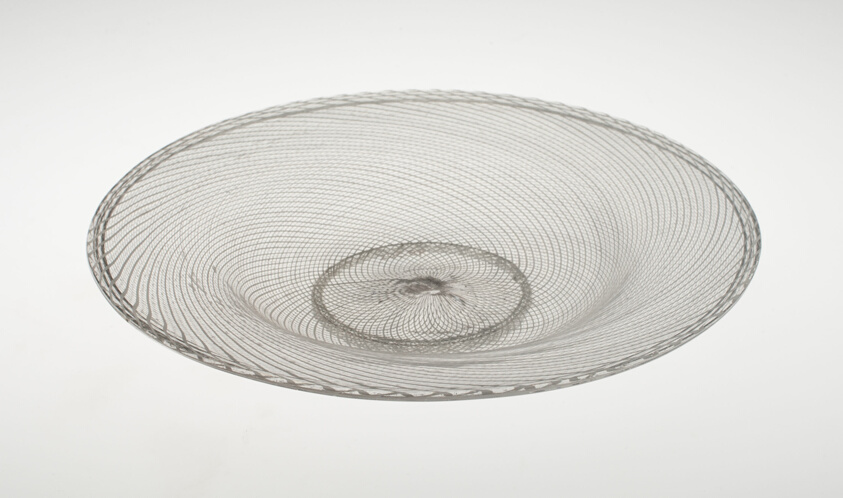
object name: Glass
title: Dish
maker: Italian; Venice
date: 1575/1600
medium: Glass (vetro a reticello)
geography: Venice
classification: dish (vessel); glass; european decorative arts